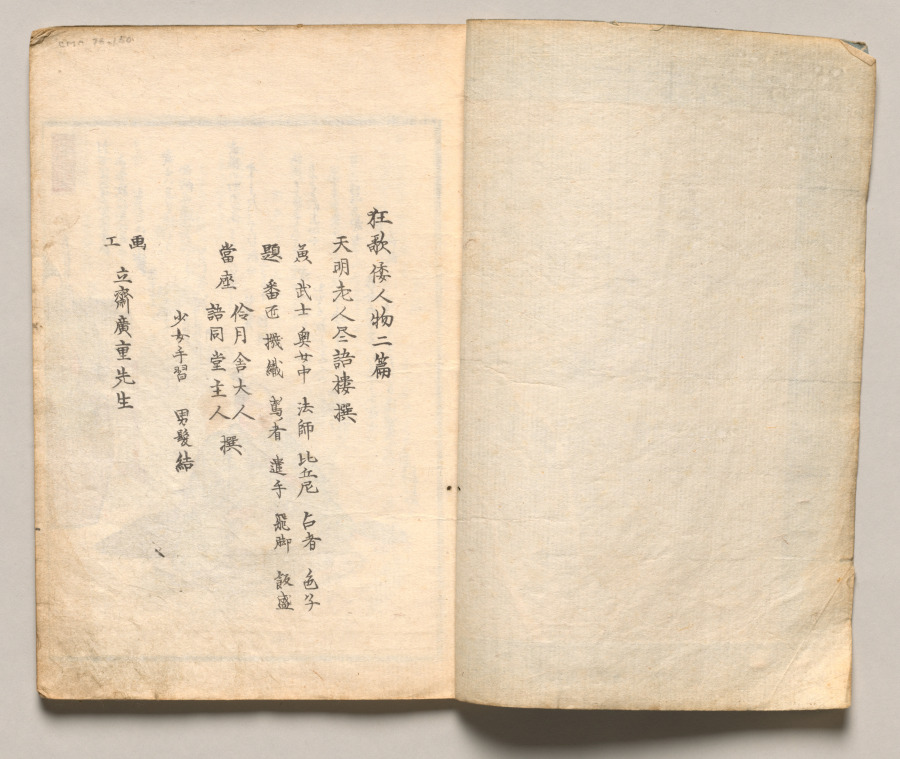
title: Spread One from Volume Two of People of Japan in Light Verse (Kyōka)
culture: Japan, Edo period (1615–1868)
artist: Utagawa Hiroshige (Japanese, 1797–1858)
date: 1857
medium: Woodblock-printed book; ink and color on paper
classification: Bound Volume